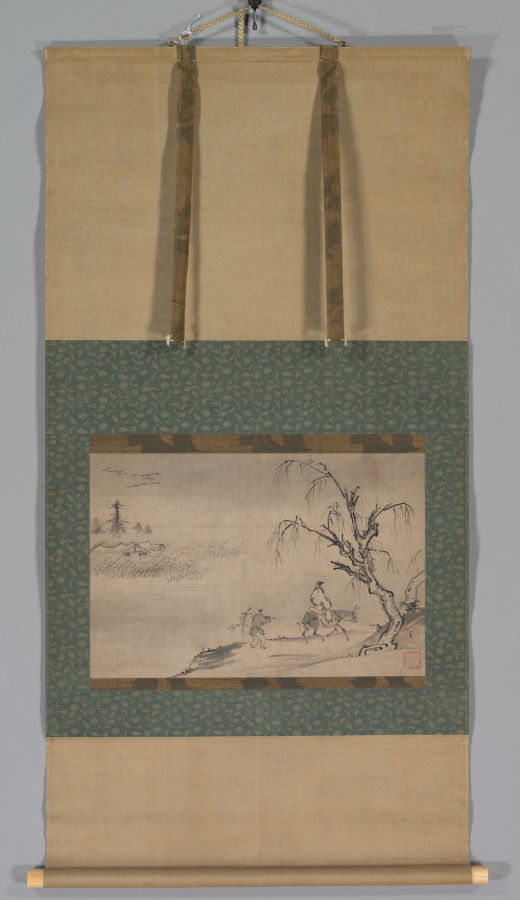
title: Chinese Literatus in an Autumn Landscape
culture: Japan, Muromachi period (1392–1573)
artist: Josui Sōen (Japanese, active c. 1489–1500)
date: late 1400s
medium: hanging scroll; ink on paper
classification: Painting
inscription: Signed: "Sō'en" 宗淵. Sealed: "Josui" 如水; one seal unread.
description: In this painting, Sesshū Tōyō’s disciple Sōen depicts a Chinese scholar-official astride a donkey with his attendant behind. Framing their passage on the right side of the scene are two bare willows, and on the left, geese in flight, the cries of which capture the pair’s attention. These elements suggest that the season is late autumn. Sōen, who famously received Sesshū’s 1495 Splashed-ink Landscape as a certificate of his success as a pupil, studied with the master in Suō, presentday Yamaguchi, after which he returned to his native province in the Kanto region.